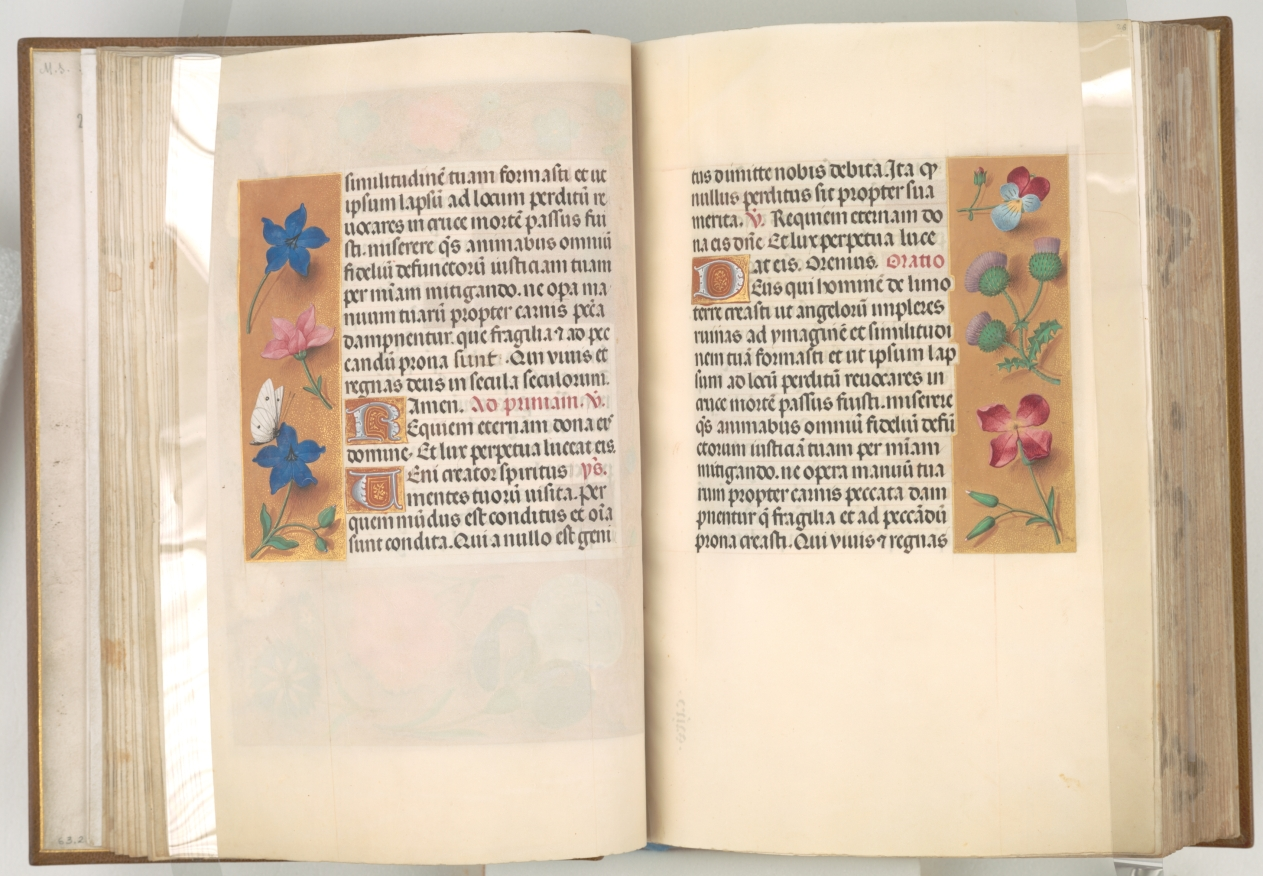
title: Hours of Queen Isabella the Catholic, Queen of Spain: Fol. 25v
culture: Flanders, Ghent and Bruges, late 15th century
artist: Master of the First Prayerbook of Maximillian (Flemish, c. 1444–1519)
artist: and Associates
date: c. 1500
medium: ink, tempera, and gold on vellum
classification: Bound Volume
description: A great lover of Flemish art, Queen Isabella treasured her many devotional books. This deluxe manuscript was created for her private devotions by highly organized and distinctly talented manuscript painters active in Ghent and Bruges. The Ghent-Bruges school represents the culmination of Flemish book painting, whose main features were the use of rich colors, illusionistic effects, a love of landscape, and a strong sense of visual narrative. Manuscripts produced by this circle of artists are renowned for their border decoration featuring a rich variety of realistically painted flowers, scrolling acanthus leaves, birds, and butterflies.